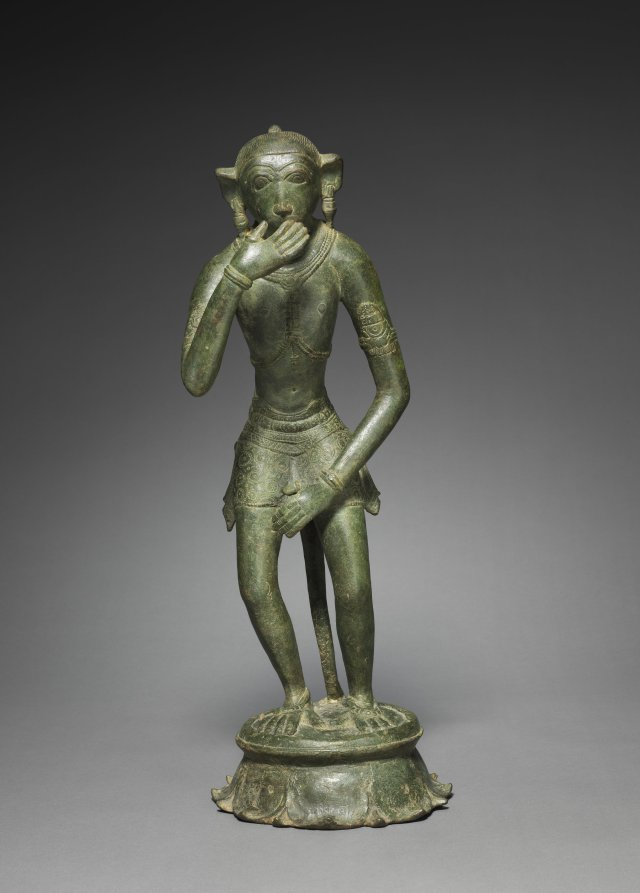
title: Monkey General Hanuman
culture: Southern India, Chola period (900s–1200s)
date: c. 1000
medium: bronze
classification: Sculpture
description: Hanuman is one of the most popular heroic figures of the epic Ramayana. In the story, he was indispensable in the search for the abducted wife of Rama, an incarnation of Vishnu. He is able to fly through the air and lift mountains, but here he is shown as a humble servant of the god. His gestures signify his humility and he bows slightly in reverence to his master. Bronzes during the Chola period spanning the 800s to 1200s were solid cast, using the lost-wax method. Each one is unique and would have been kept in the treasury of the temple until the festival day when the presence of the deity is invited to reside in the sculpture, which is then bathed, dressed, and paraded through the streets. This figure would have been paraded with a group of other images depicting Rama, his wife, and his brother.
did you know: Hanuman stands on a lotus pedestal with slightly upturned petals.